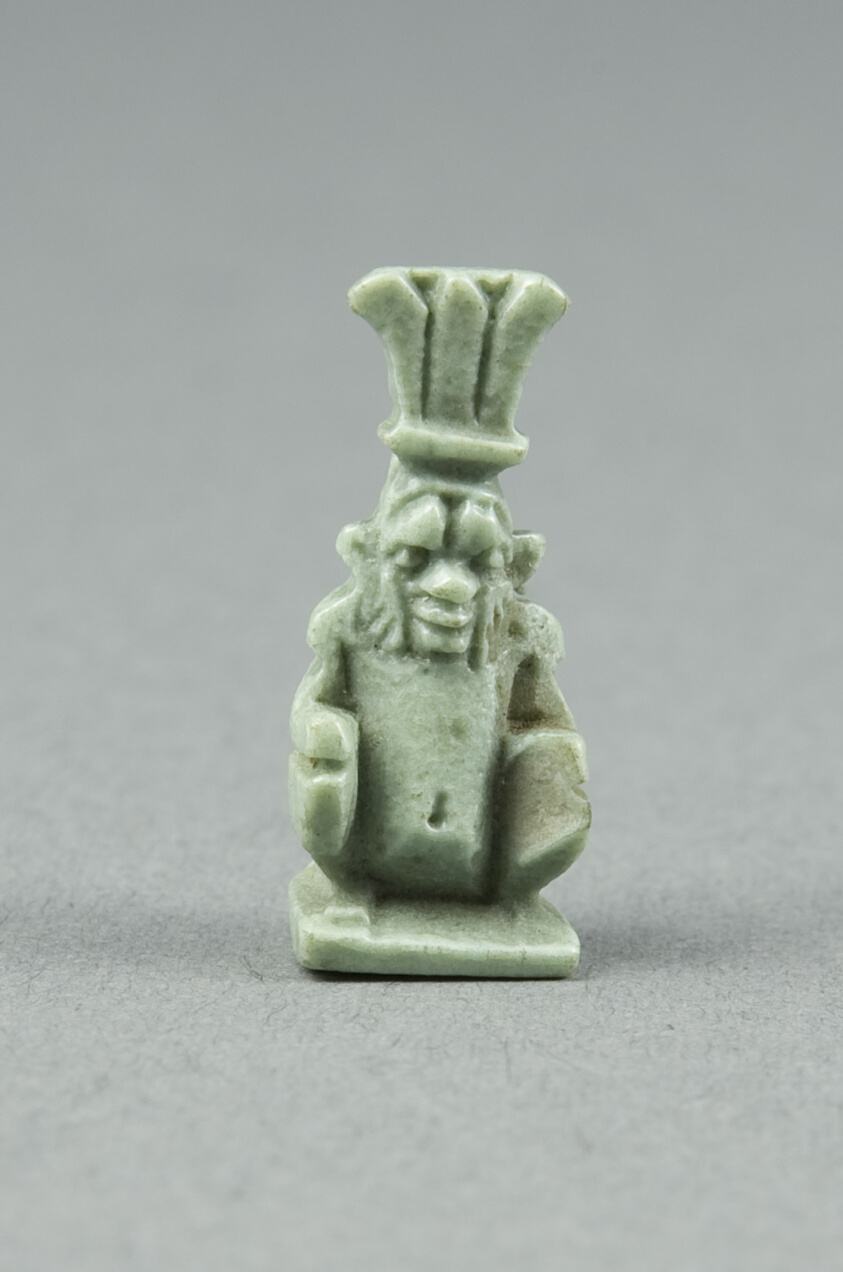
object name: Costume and Accessories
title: Amulet of the God Bes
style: egyptian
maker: Egyptian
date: Late Period, Dynasty 26–31 (664–332 BCE)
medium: Faience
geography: Egypt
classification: amulet; jewelry; ceramics; ancient art; costume; faïence (composite material)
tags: gods (deities)